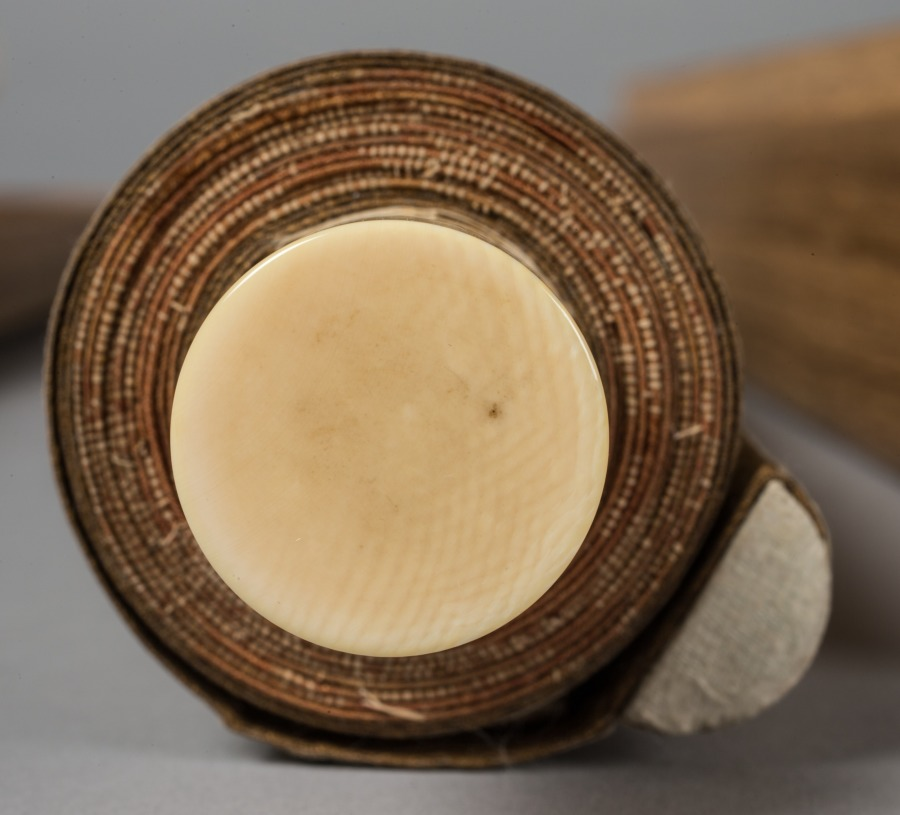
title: Beauty (Bijin)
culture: Japan, Edo period (1615–1868)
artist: Katsushika Hokusai (Japanese, 1760–1849)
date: c. 1775–1849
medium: hanging scroll; ink and color on paper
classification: Painting